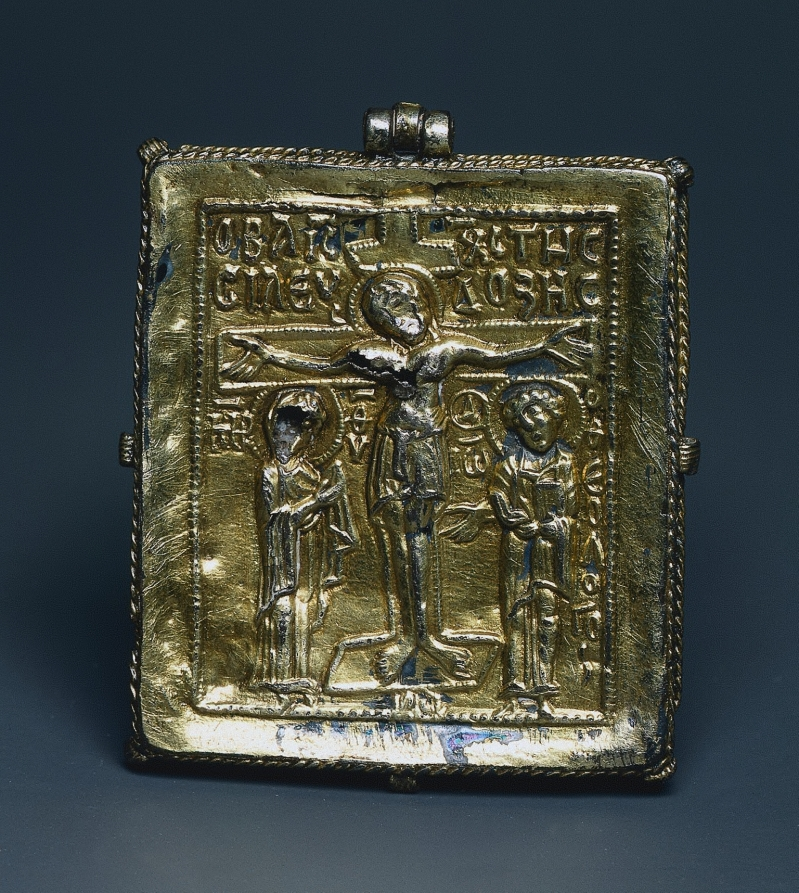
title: Enkolpion with the Crucifixion (front) and Saints Theodore and George (back)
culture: Byzantium, Constantinople, Byzantine period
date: 1080–1120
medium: silver gilt and cloisoné enamel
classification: Metalwork